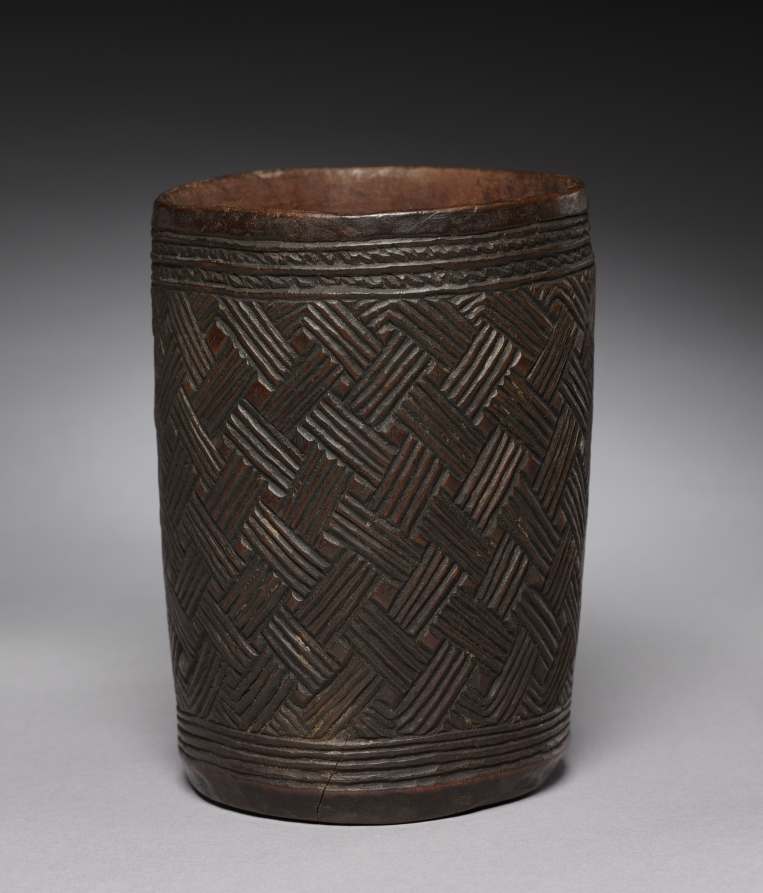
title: Cup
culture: Africa, Central Africa, Democratic Republic of the Congo, Kuba-style maker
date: early 1900s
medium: Wood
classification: Vessels